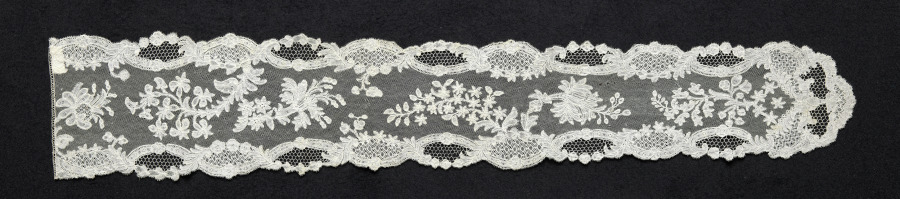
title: Lace Lappet (one of a pair)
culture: Belgium, Brussels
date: 1700s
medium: Linen: bobbin lace (Point d'Angleterre)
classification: Lace